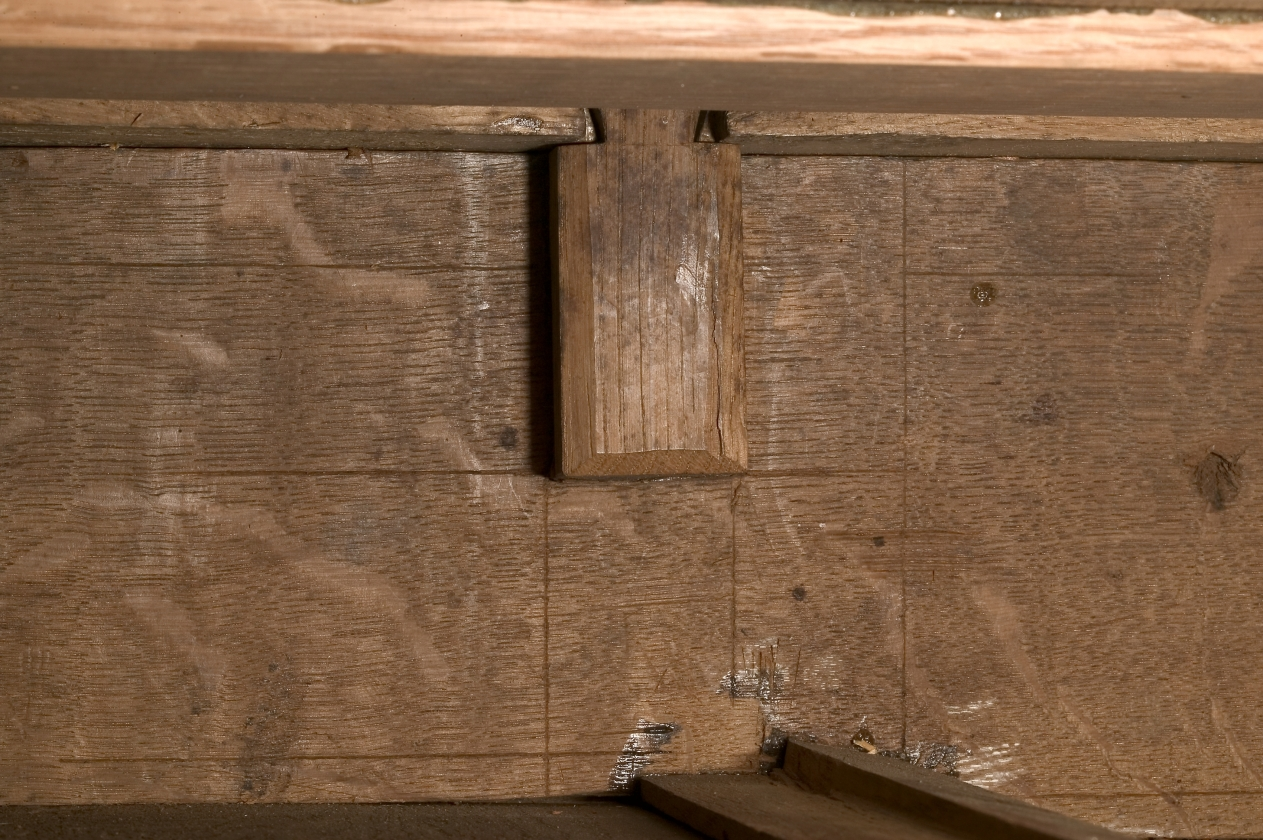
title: Table Desk (Bureau Plat)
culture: France, 18th century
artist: Bernard II van Riesen Burgh (Dutch, 1766)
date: c. 1750– 1760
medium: wood marquetry with gilt bronze mounts, leather top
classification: Furniture and woodwork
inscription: signed three times on bottom edge of apron: B. V. R. B.